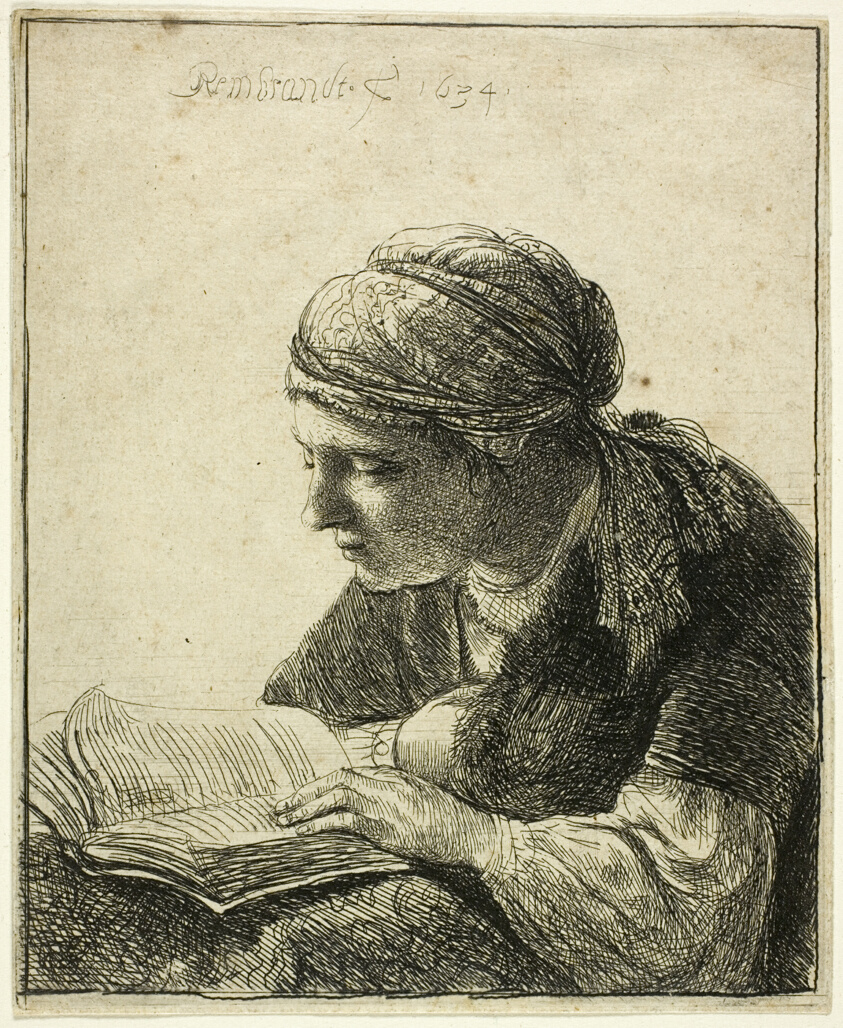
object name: Print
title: Woman Reading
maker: Rembrandt van Rijn (Dutch, 1606-1669)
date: 1634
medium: Etching on paper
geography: Holland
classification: etching; print; prints and drawing; paper